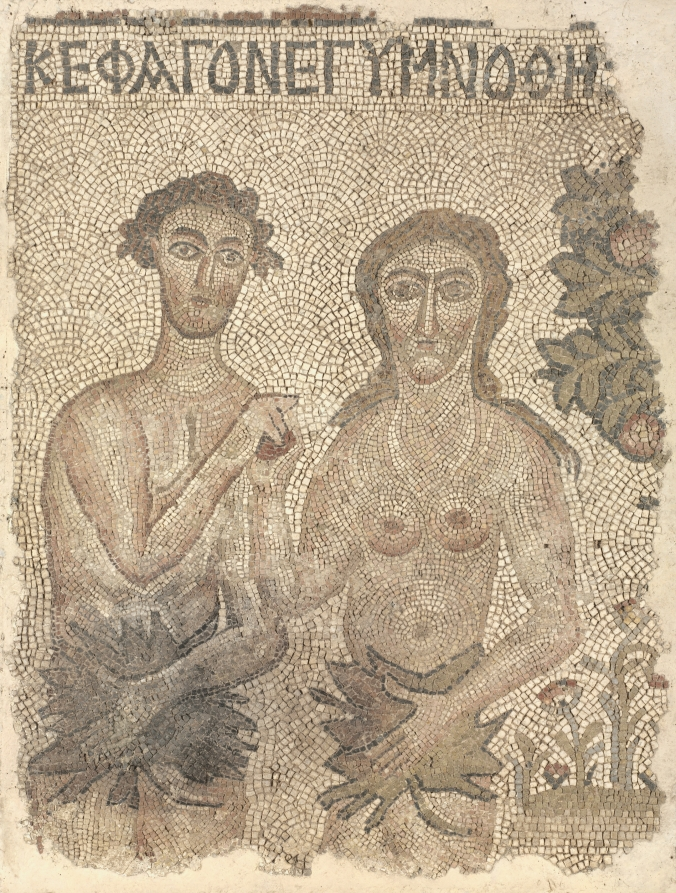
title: Fragment of a Floor Mosaic: Adam and Eve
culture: early Byzantium, Northern Syria, Byzantine period, late 5th-early 6th century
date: late 400s–early 500s CE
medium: marble and stone tesserae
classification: Mosaic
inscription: ΚΕΘΑΓΟΝΕΓΥΜΝΟΘΗ (Κ’ΕΘΑΓΟΝ ΕΓΥΜΝΟΘΗ[ΣΑΝ] = κ[αι] ἔφαγον ἐγυμνώθη[σαν])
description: This mosaic panel representing the Fall of Adam and Eve once formed part of a much larger mosaic decorating the floor of an early Byzantine church in northern Syria. Here, Adam and Eve are portrayed sharing the forbidden fruit while covering themselves with large leaves. At the top of the panel, a Greek inscription reads, "And they ate and they were made naked," recalling the biblical text (Gen. 3:7) and highlighting the two moments in the biblical narrative of the Fall that are depicted here.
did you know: In the Syrian village where this mosaic was created, few people could read and even fewer had access to books. The images within the church educated the community, leading 5th-century Pope Gregory the Great to describe religious images as "books for the illiterate."